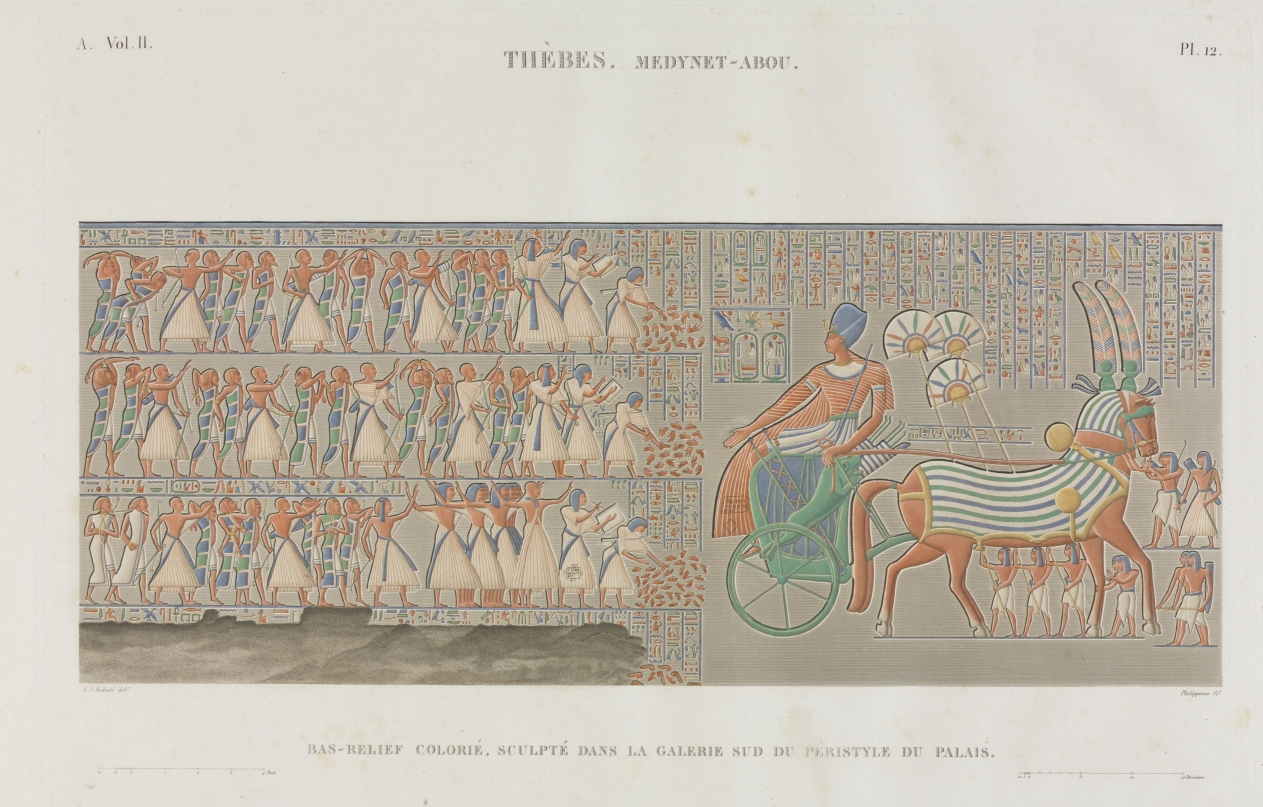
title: Description of Egypt: Thebes. Medynet-Abou, Vol. II, Pl. 12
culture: France, 19th century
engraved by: Antoine Phelippeaux (French, 1767–1830)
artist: after Henri Joseph Redouté (French, 1766–1853)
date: 1822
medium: engraving, hand-colored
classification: Print